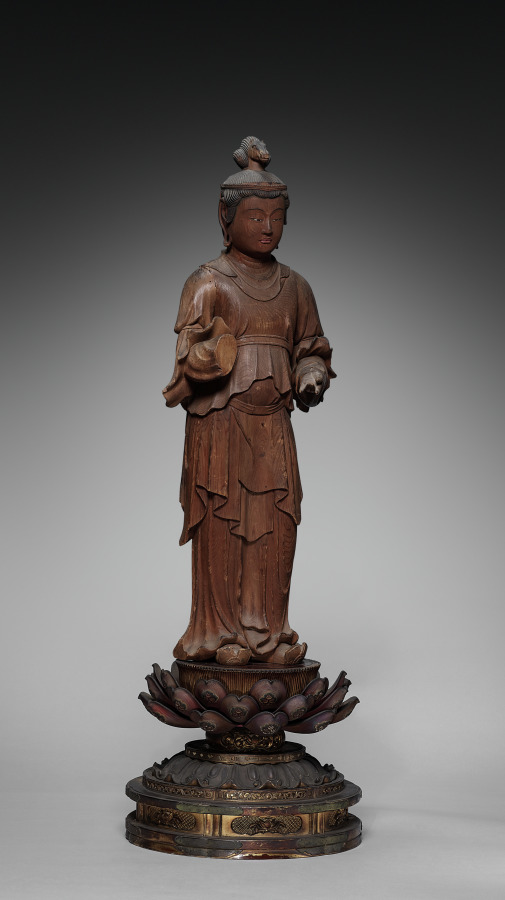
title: Batō (Horse-Headed) Kannon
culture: Japan, Kamakura period (1185–1333)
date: early 1300s, pedestal 1600s–1700s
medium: Wood with traces of color and gold; pedestal: wood with lacquer, color, and gold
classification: Sculpture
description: Batō Kannon, or Hayagriva Avalokiteshvara in Sanskrit, is the “horse-headed” form of the bodhisattva of compassion, who presides over the realm of animals in the Buddhist Six Realms of Transmigration (rebirth). A horse’s head appears in the hair of this sculpture to identify it. Bodhisattvas are beings who, though enlightened, choose to remain within the worlds of existence to help others. The six realms are heaven, hell, human, animal, hungry ghost, and ashura, or fierce supernatural entities.